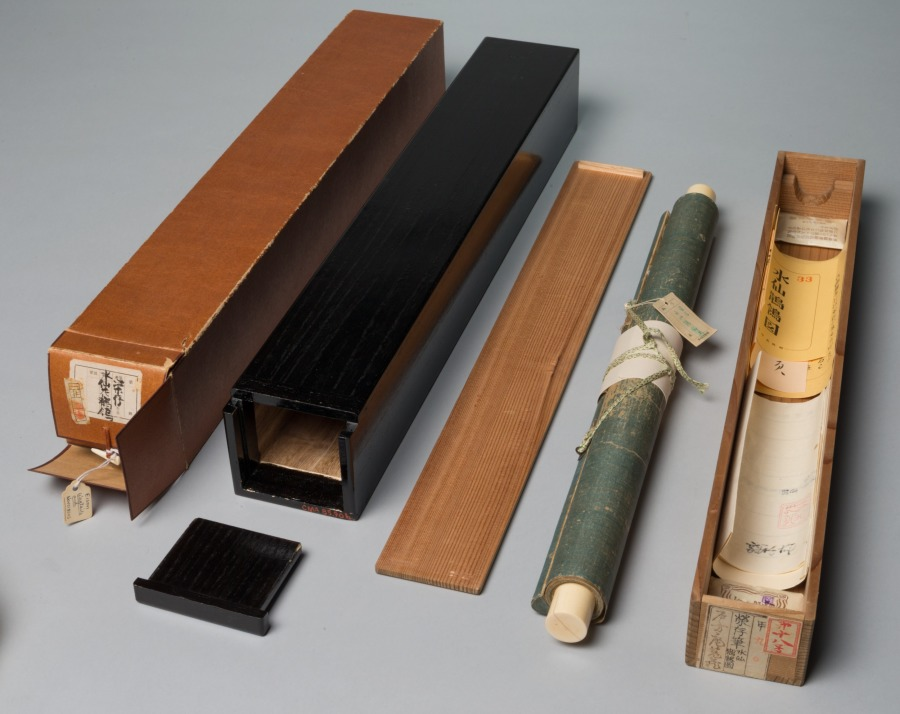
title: Wagtails and Narcissus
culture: Japan, Muromachi period (1392–1573)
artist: Eison (Japanese)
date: mid-1500s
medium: hanging scroll; ink on paper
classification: Painting